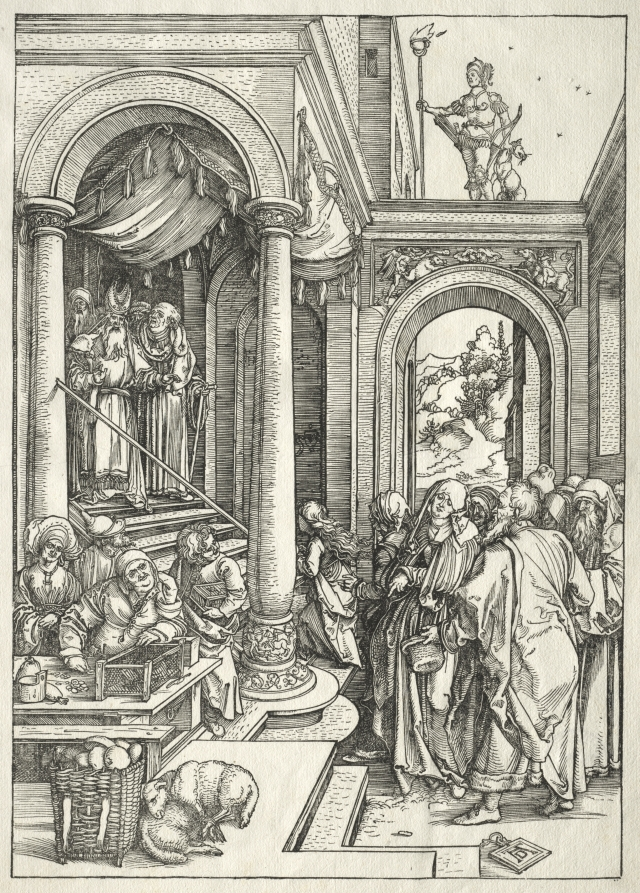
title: Life of the Virgin: Presentation of the Young Virgin in the Temple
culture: Germany, early 16th Century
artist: Albrecht Dürer (German, 1471–1528)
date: 1504–1505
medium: woodcut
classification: Print